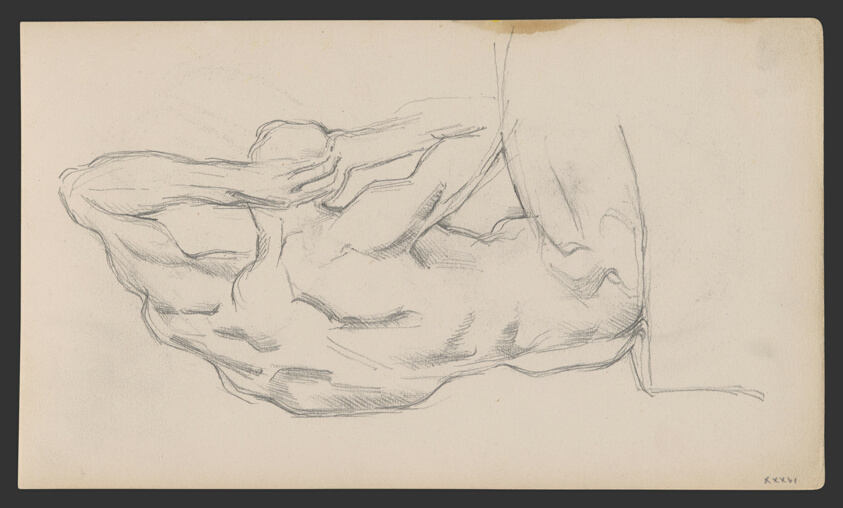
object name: Drawing and Watercolor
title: Sketchbook No. 2 (L'Estaque)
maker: Paul Cézanne; French, 1839-1906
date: 1875–86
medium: Graphite and pen and ink drawings on paper, bound into a book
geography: France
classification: sketchbook; graphite; prints and drawing; paper